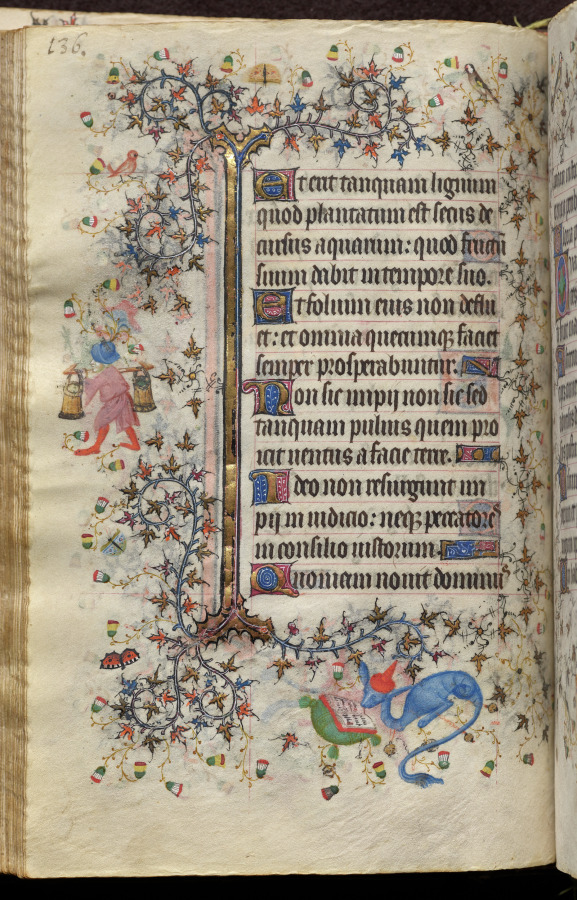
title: Hours of Charles the Noble, King of Navarre (1361-1425): fol. 68v, Text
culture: France, Paris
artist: Master of the Brussels Initials and Associates (French)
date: c. 1405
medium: ink, tempera, and gold on vellum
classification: Bound Volume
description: This precious volume was obviously highly prized by its owner, the French-born King of Navarre, who had his coat of arms painted on no less than twenty folios. Rather than directly commissioning this manuscript from a specific workshop, it seems that Charles the Noble acquired his book of hours -- perhaps ready-made for the luxury market -- while on a trip to Paris in 1404-05. A collaborative effort, six painting styles are evidenced within the pages of this codex, those of two Italians, two Frenchmen, and two Netherlanders. The painter who was responsible for the planning and decoration of the book, and who produced seventeen of the large miniatures, was a Bolognese artist known as the Master of the Brussels Initials. His principal assistant, responsible for most of the borders, was a Florentine who signed his name "Zecho" da Firenze on folio 208 verso.